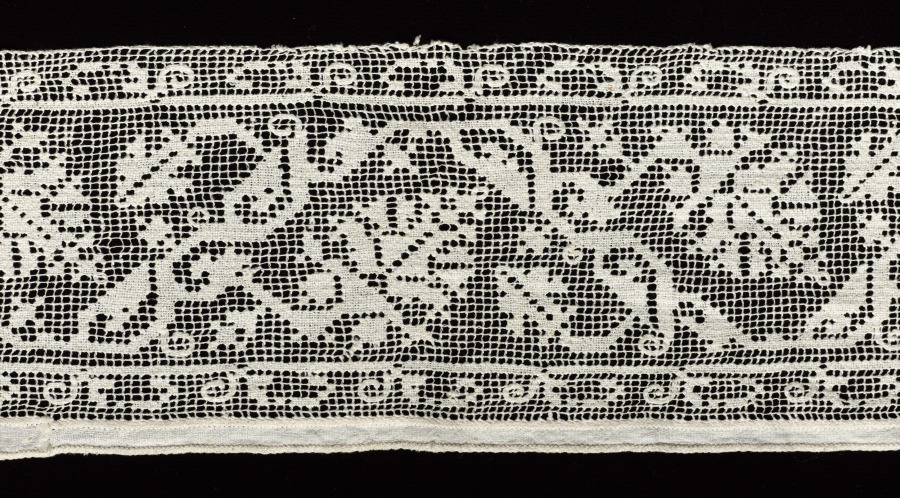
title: Fragment of a Band with Vines and Leaves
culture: Italy, 1600s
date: 1600s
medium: Bleached linen (est.): needle lace, filet/lacis (knotted ground and darned in one and two directions)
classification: Lace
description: A scrolling vine with budding vegetation or a tendril is a recurring pattern in needle lace. The frequent use of the motif, adapted in lace from different centuries and regions, suggests that it was found in a pattern book.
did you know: Books of patterns for lace making and other needlework were aimed at well-to-do women and girls to encourage domestic virtue.